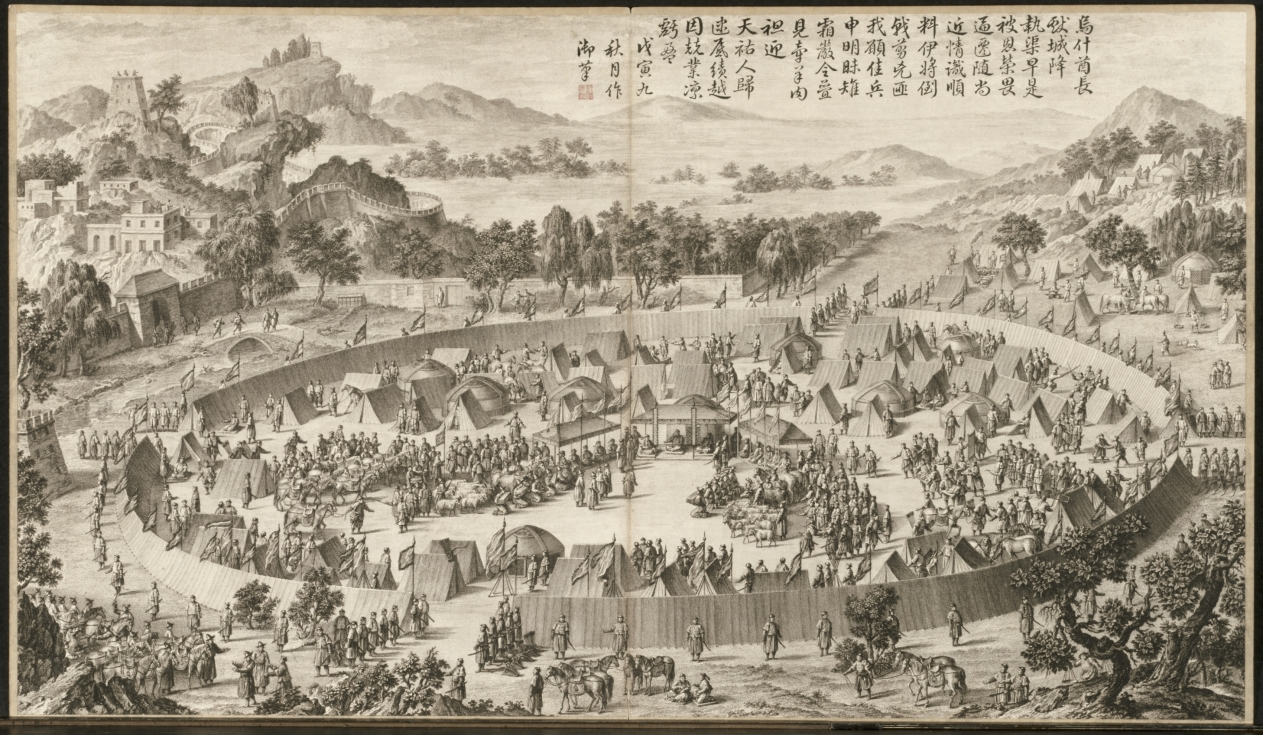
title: Chieftain Wushe Surrendering the City: from Battle Scenes of the Quelling of the Rebellions in the Western Regions, with imperial Poems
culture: China, Qing dynasty (1644–1911), Qianlong reign (1736–95)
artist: Jean Damascene Sallusti (Italian, d. 1781)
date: c. 1765–74; poem dated 1758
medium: etching, mounted in album form, 16 leaves plus two additional leaves of inscriptions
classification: Print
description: This set of etchings was commissioned by Emperor Qianlong to record in pictorial terms the courage of his generals and soldiers in quelling the rebellions in the Western Regions. Qianlong added his own poem to each of the etchings, indicating his appreciation and pride in this demonstration of military might. "Western Regions" refers to the present-day Xingjiang province, often described in Western writing as "Central Asia."